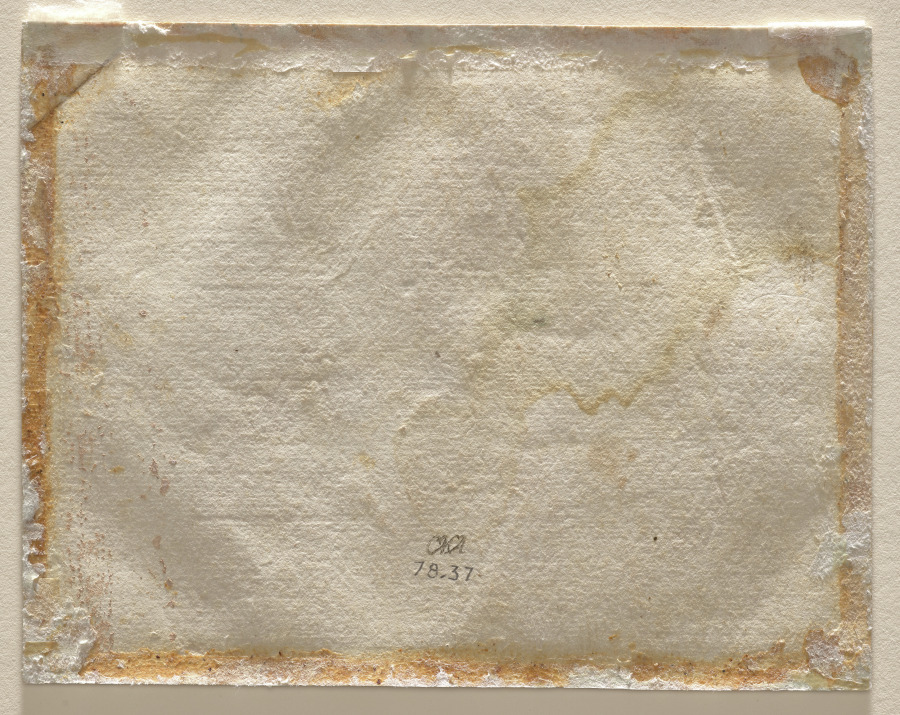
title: Studies of a Seated Female, Child's Head, and Three Studies of a Baby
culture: Italy, 16th century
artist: Raphael (Italian, 1483–1520)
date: c. 1507–8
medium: metalpoint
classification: Drawing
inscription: lower right, in brown ink: 74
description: This drawing is from Raphael’s "pink sketchbook," comprised of ten sheets of roughly equal size that each portray variations of a mother and child. Today, six of the drawings at the Palais des Beaux-Arts, Lille; two are at the British Museum; one is in a private collection; and one is in Cleveland. The small format of the sheets would have enabled the artist to carry the notebook as he traveled from Florence to Rome in 1508. Raphael used metalpoint, a technique popular in 15th- and early 16th-century Italy on a pink prepared surface. The pose of the infant's head in the drawing was based on that of the Christ child in Leonardo da Vinci's Benois Madonna, then in a private collection in Florence, with changes—such as the uplifted eyes and open mouth—made by Raphael. The curving back of the female nude is echoed in the roundness of the child's head. The three sketches of a reclining infant at the bottom of the sheet are freely handled and improvisational, relaying the child's squirming, continuous movement with repeated contour lines.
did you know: This sheet was probably once part of a sketchbook carried by the artist Raphael on a 1508 journey between Florence and Rome.